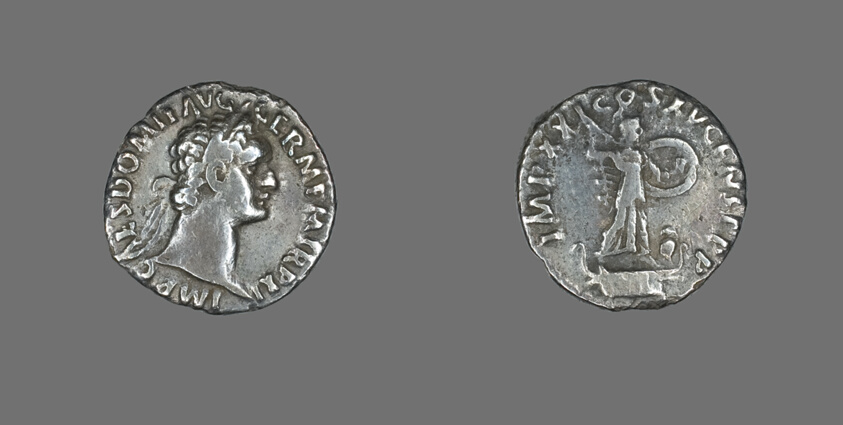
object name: Coin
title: Denarius (Coin) Portraying Emperor Domitian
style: roman (ancient, style or period)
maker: Roman, minted in Rome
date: 91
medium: Silver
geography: Roman Empire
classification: coin; ancient art